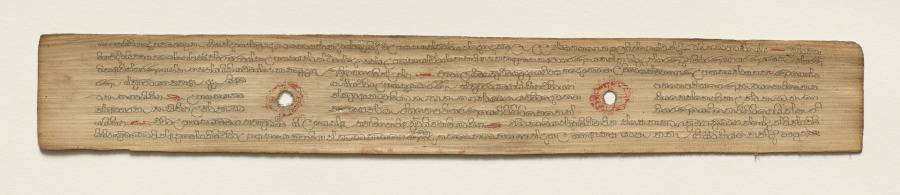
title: Leaf from a Buddhist Manuscript (verso)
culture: Sri Lanka, Singhalese, Late 17th century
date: c. 1700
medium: fiber paper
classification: Manuscript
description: Palm leaf material is still used for manuscripts in Sri Lanka. The palm leaves are prepared first by boiling them, drying them in the sun, and then rubbing them with oils. Scribes then use a metal stylus to incise the text. Then charcoal powder is wiped across the pages, filling in only the inscribed lines.